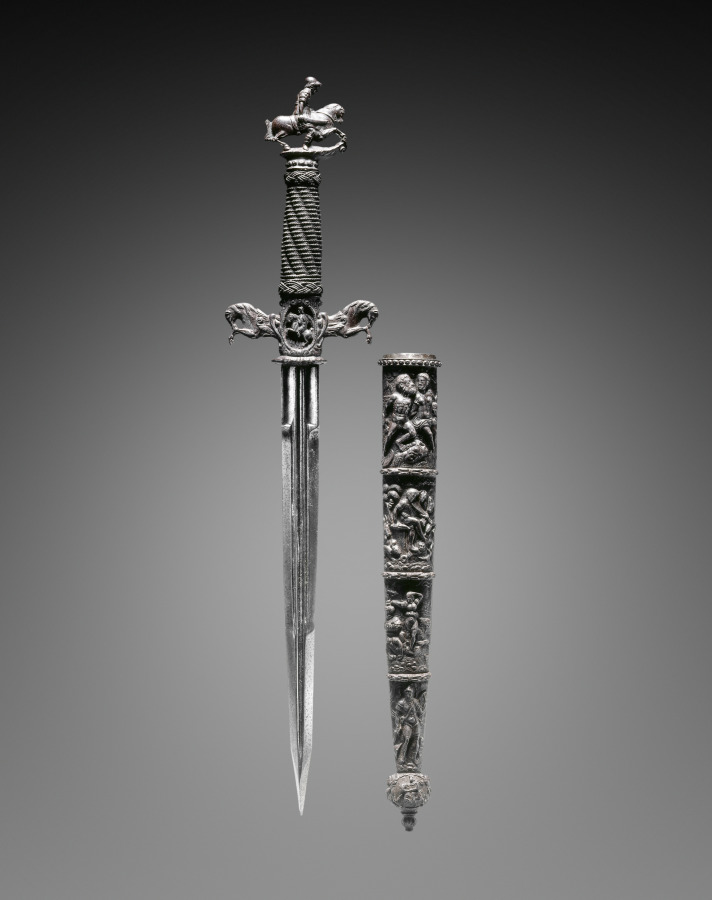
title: Dagger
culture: Switzerland and/or France, 17th century (16th century blade)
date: 1600s (1500s blade)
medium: steel and wire; chiseled quillions and pommel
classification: Arms and Armor